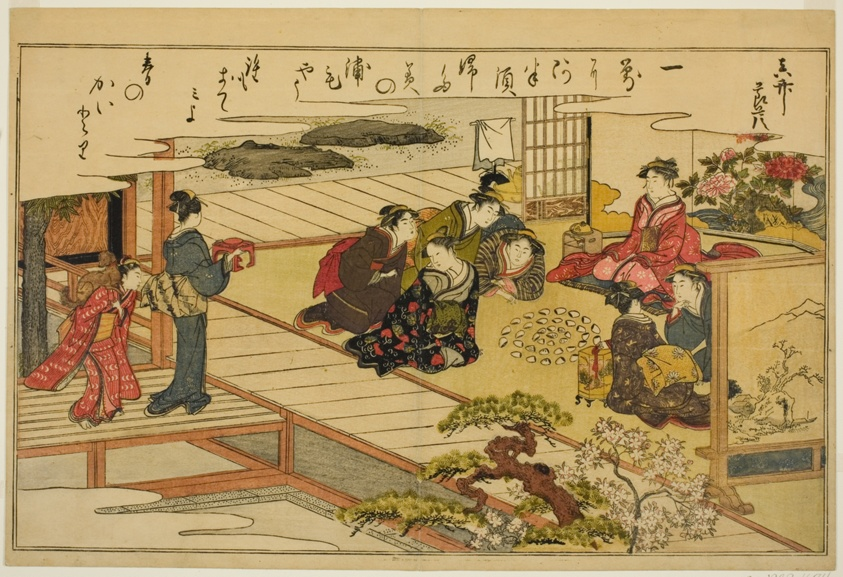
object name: Print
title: Shell-Matching Game, from the illustrated book "Gifts from the Ebb Tide (Shiohi no tsuto)"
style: Japanese (culture or style)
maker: Kitagawa Utamaro 喜多川 歌麿; Japanese, 1753 (?)-1806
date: 1789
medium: Color woodblock print; double-page illustration from book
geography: Japan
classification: woodblock print; print; asian art